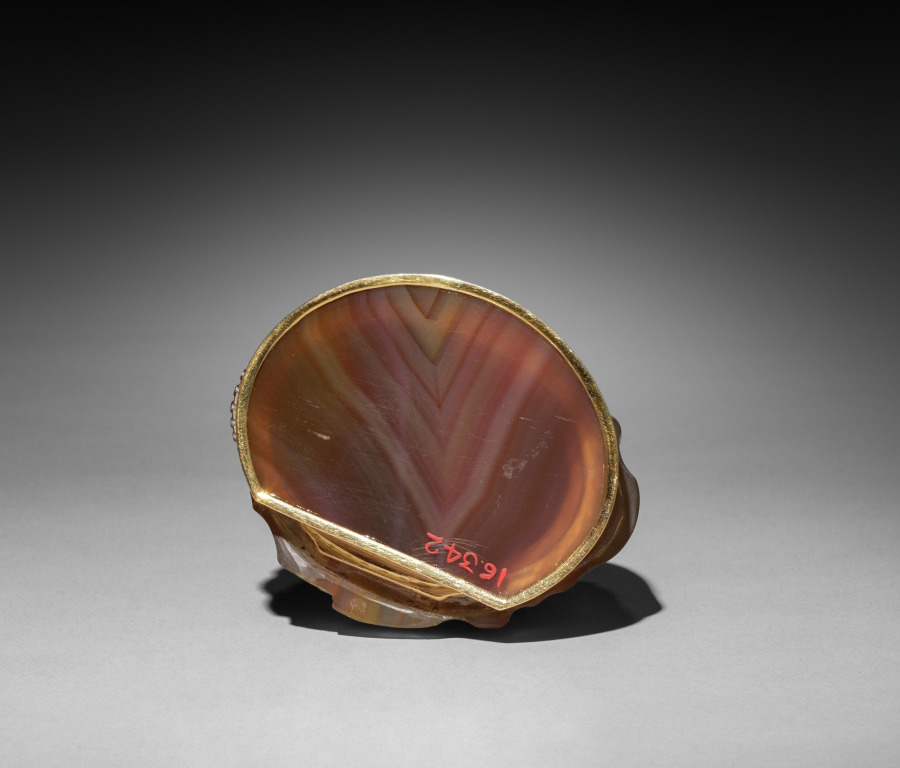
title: Scent Bottle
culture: England, 18th century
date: c. 1770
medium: chalcedony mounted in gold decorated with diamonds and enamel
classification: Miscellaneous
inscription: on neck collar: Gage d'amitie.